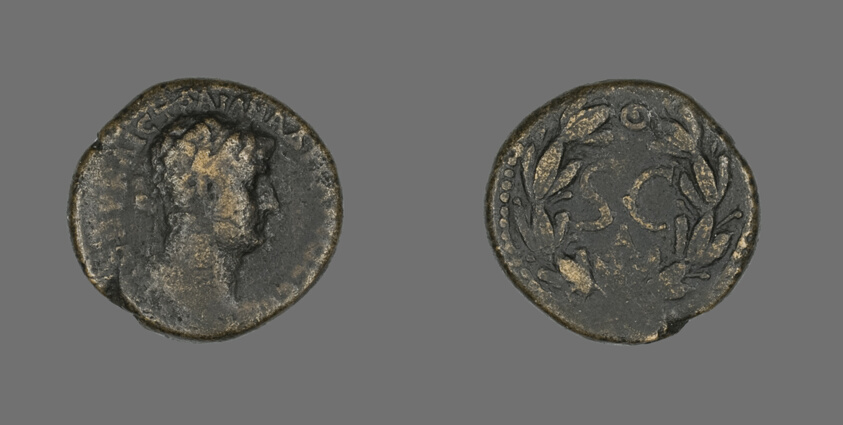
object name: Coin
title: Coin Portraying Emperor Hadrian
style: roman (ancient, style or period), ancient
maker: Roman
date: 117-138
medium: Bronze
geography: Roman Empire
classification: coin; ancient art